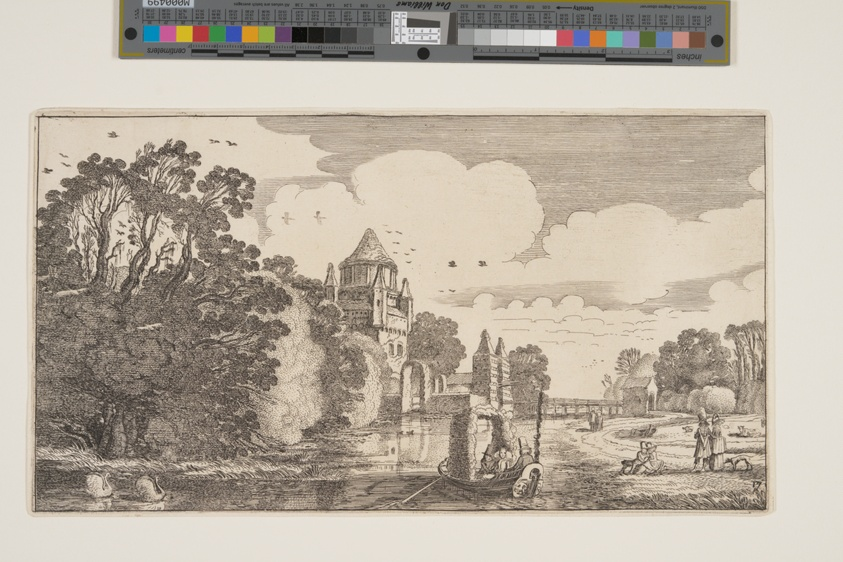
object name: Print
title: The ‘Kleine Houtpoort’ at Haarlem, from Landscapes (Playsante Lantschappen)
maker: Attributed to Claes Jansz. Visscher II (Dutch, 1586-1652); after Jan van de Velde II (Dutch, c. 1593-1641)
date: c. 1641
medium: Etching, with engraving, on ivory laid paper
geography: Netherlands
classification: etching; paper; print; prints and drawing